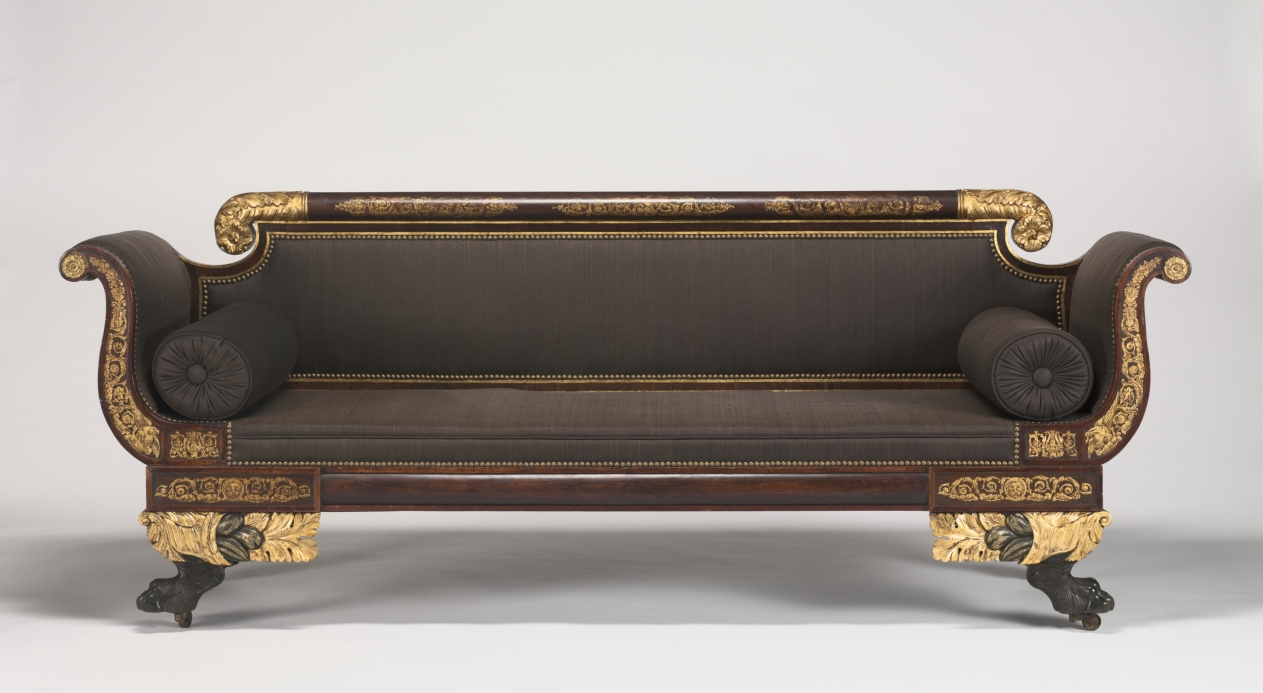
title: Sofa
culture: America, New York, Empire style, 19th century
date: c. 1820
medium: wood with painted and gilded decoration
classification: Furniture and woodwork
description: The classically inspired elements of design such as the scrolled arms and the well executed gilt decoration identifies this sofa as an example of American Empire style furniture almost certainly made in New York City.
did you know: At first glance you might not notice the animals, but look closely and you will discover the small faces of lions and the outstretched wings of eagles that decorate this sofa's frame. Furniture made in the Empire style was adapted from ancient Grecian forms by Parisian and American cabinet makers influenced by the classical style.